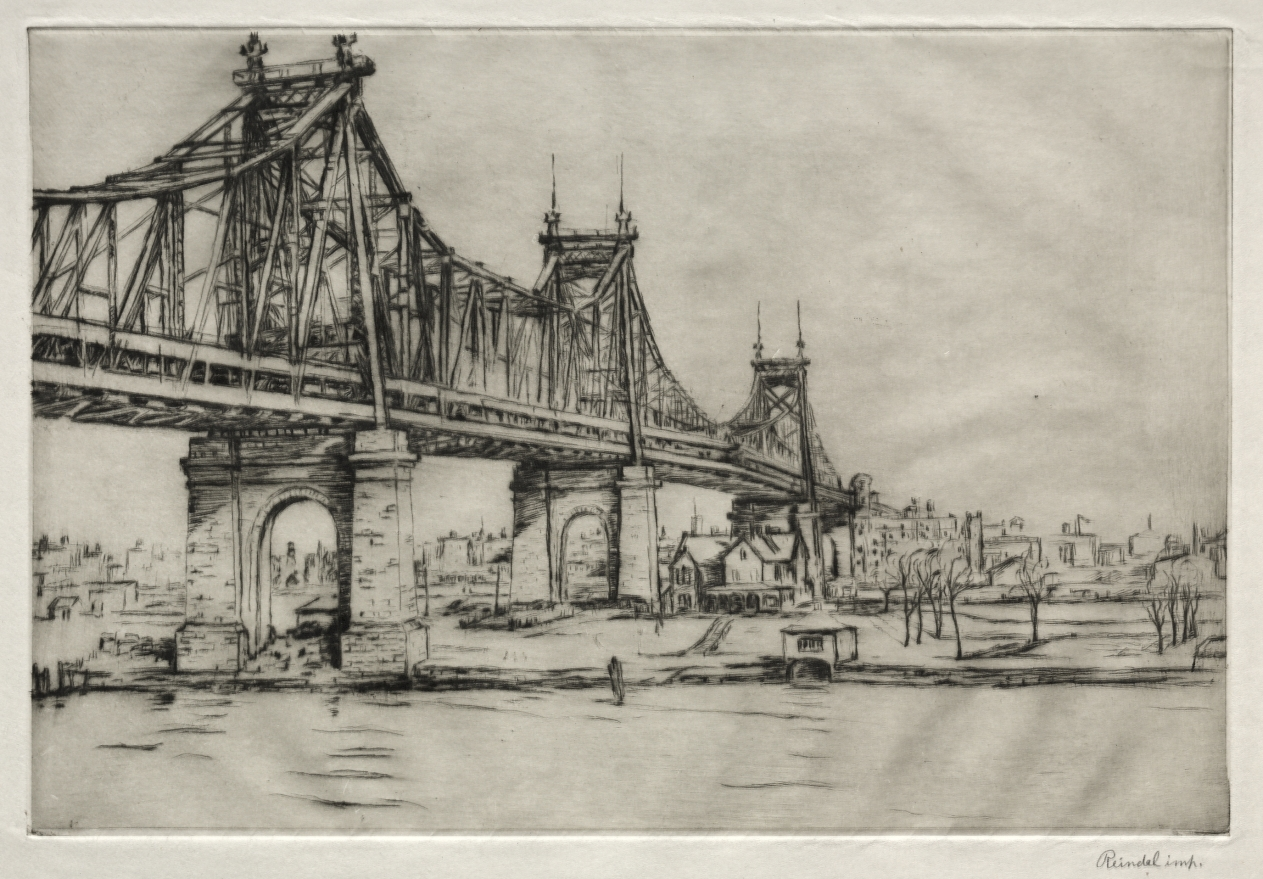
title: Queensboro Bridge, New York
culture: America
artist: William George Reindel (American, 1871–1948)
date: 1921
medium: drypoint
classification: Print